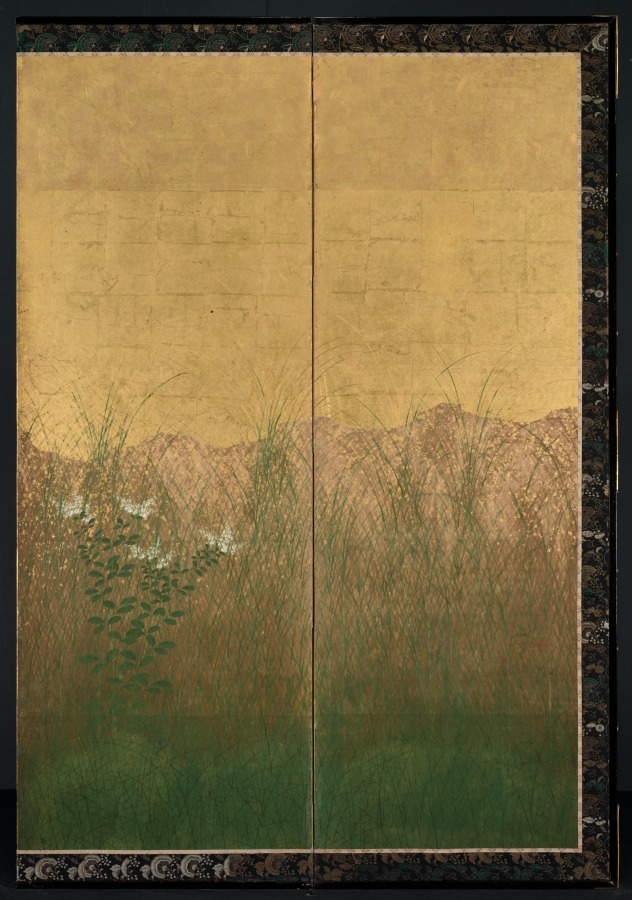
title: Autumn Evening with Full Moon on Musashino Plain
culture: Japan, Edo period (1615–1868)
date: early 1600s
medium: One of a pair of six-fold screens; ink, color, and gold and silver foil on gilded paper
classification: Painting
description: Tall grasses and autumn flowers reach out of thick green undergrowth in this depiction of the plain of Musashi, a site famous from classical Japanese poetry. A silver disc, now tarnished, represents the full moon. Flecks of cut-gold foil in the sky evoke the day’s passage into night. Once a wilderness with a vast horizon, Musashi is now densely populated.